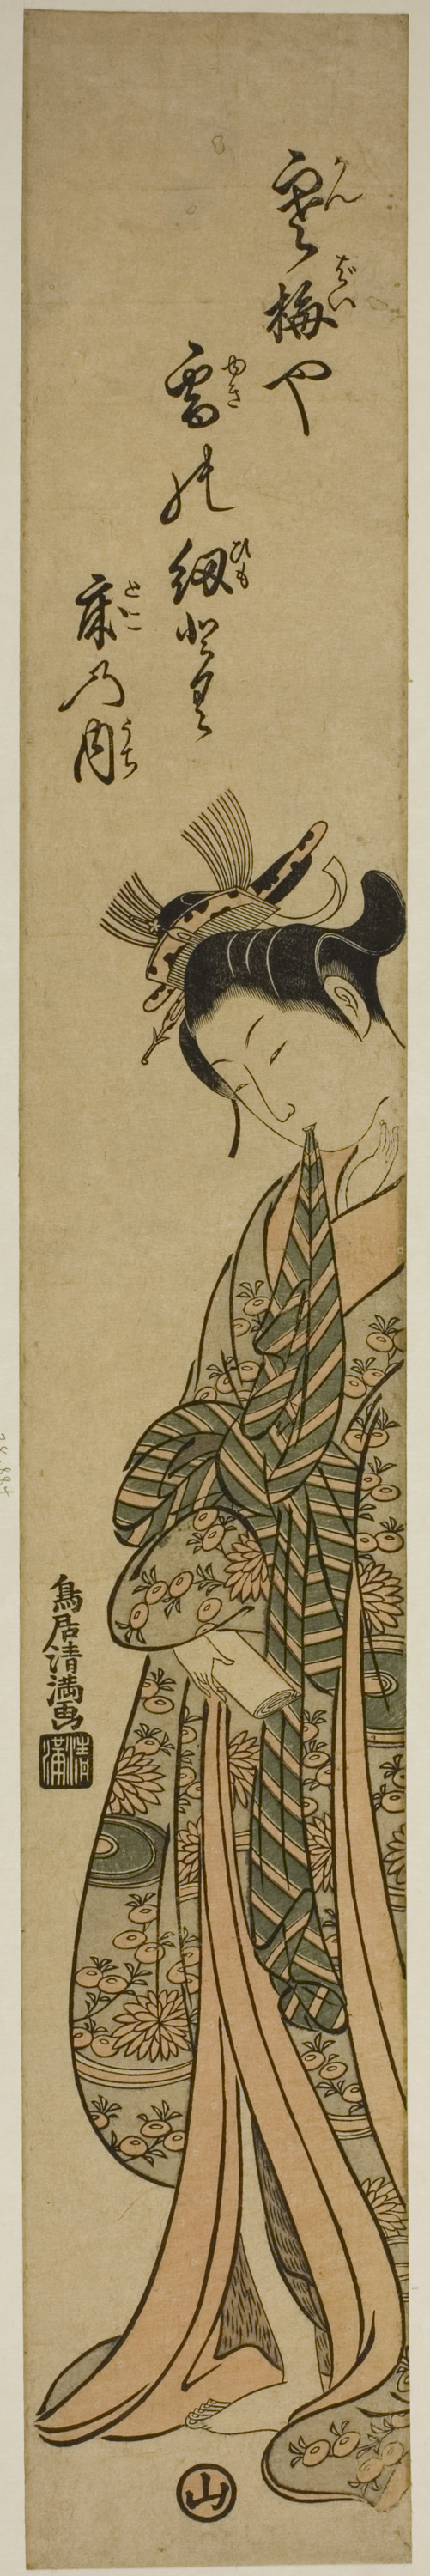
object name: Print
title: Young woman holding obi between her teeth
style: Japanese (culture or style)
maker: Torii Kiyomitsu I (Japanese, 1735-1785)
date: c. 1760/64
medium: Color woodblock print; hashira-e, benizuri-e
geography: Japan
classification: woodblock print; print; asian art